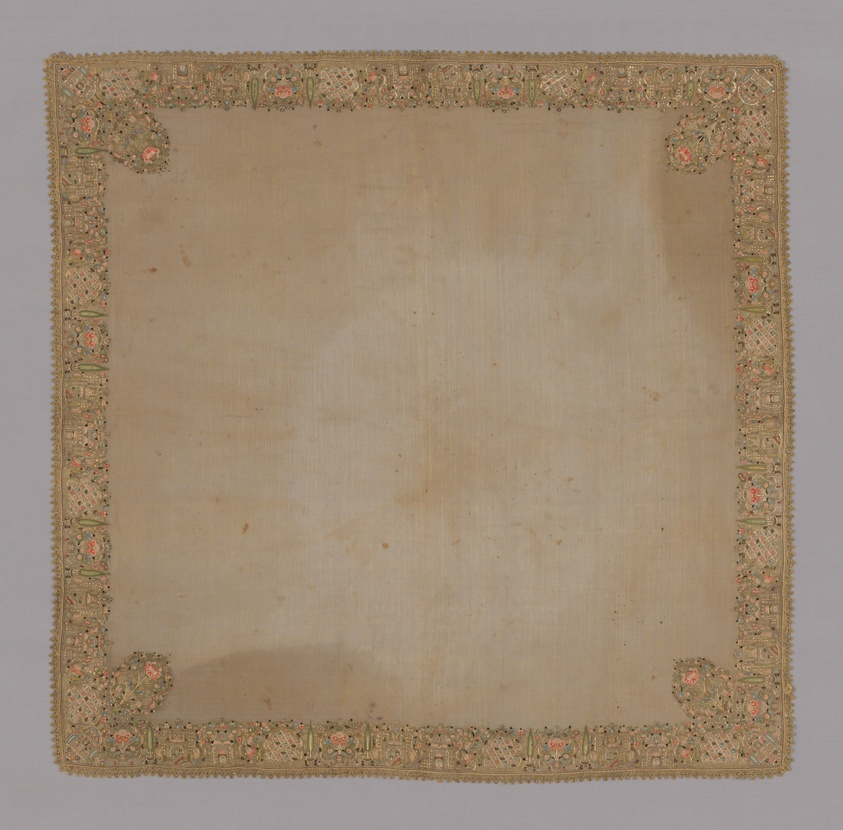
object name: Textile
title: Cover or Handkerchief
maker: Turkey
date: 1775/1900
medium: Embroidered in floral, kiosk and cypress design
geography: Turkey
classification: textile; weaving; needlework (visual works)